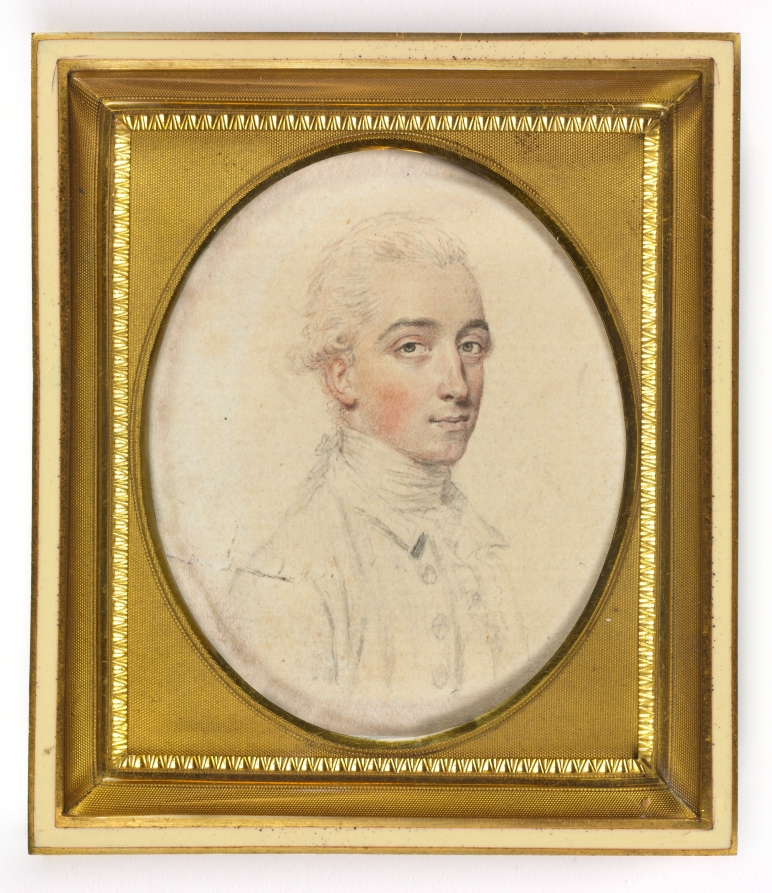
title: Portrait of Mr. Gambier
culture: England, 18th century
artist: John I Smart (British, 1741–1811)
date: c. 1776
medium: graphite and wash on laid paper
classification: Portrait Miniature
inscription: Signature: none; inscribed in graphite on front of paper at upper right corner: [?][?]2; inscribed on paper backing: in graphite, upside down at upper left: 15; in graphite, on a slant at left center to upper right: Mr. Fitzherbert; inscribed on back of paper in graphite: Mr. [Gambier]; inscribed in brown ink: Gambier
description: Although it is impossible to say if it was always part of the artist’s process to execute a preparatory sketch prior to painting each miniature, we do know that John Smart retained many hundreds of these sketches. A group of preparatory sketches—of which this portrait is one—descended through the Smirke family after Smart’s daughter Sarah gave a sketchbook containing preparatory portrait studies to her friend Mary Smirke, sister of the celebrated Victorian architect Sydney Smirke. This book was probably broken up around 1877 when it was divided between Sydney’s daughters Mary Jemmett and Mrs. Lange, whose portions were both sold at auction in 1928. G. C. Williamson was the first to suggest that Smart’s sketches were well known and that they were preparatory studies for the painted miniatures. Williamson listed the names of sitters from the sketches known to him at the time, and they include Mr. Fitzherbert, the identification formerly given to the sitter in this portrait. Here, the sitter’s head and shoulders are facing left. He has brown eyes and wears his powdered hair en queue. His coat has a narrow collar, under which he wears a high stock collar and frilled vest. The color of his attire is not suggested, and the background remains unpainted. Though long catalogued as Mr. Fitzherbert, the portrait was likely mistakenly designated as such at a later date. There has been confusion regarding several miniatures called Mr. Fitzherbert, which may or may not be related. There was a sketch of a different Mr. Fitzherbert in the Jemmett sale of February 29, 1928; another in the Burton-Jones collection by the 1940s; and a miniature of a Mr. Fitzherbert portrayed nearly full face and dated 1771 was sold at Sotheby’s, London, on August 1, 1934 (lot 73). The present location of these unpublished miniatures is unknown, as is their credibility as portraits of the Mr. Fitzherbert that Smart is known to have painted. When the paper backing of the Cleveland miniature was removed in 1993, the name Gambier was discovered inscribed in graphite and pen on the back. This miniature relates to a portrait of a man on ivory dated 1774, formerly in the Ashcroft collection and at one time on loan to the Victoria and Albert Museum. It was sold at Sotheby’s, London, on May 7,1946 (lot 61) and catalogued as a “miniature of a young man, by John Smart, signed and dated, head and shoulders three-quarters sinister, gaze directed at spectator, fair hair en queue, in white cravat, frilled vest and rich red coat, 1 3/8 in.” The size of the portraits correspond, though the ivory miniature represents less of the figure than is seen in the sketch and is therefore smaller. While the color red for the coat is not indicated in the sketch, Smart often left the dress of his male sitters plain in preparatory sketches. Thus, this currently unlocated miniature on ivory can be identified as Mr. Gambier. Research into the identity of this gentleman is ongoing.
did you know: Sketches helped John Smart work out the particulars of a portrait before commencing the miniature on ivory; they were useful in the event that a duplicate might later be required.